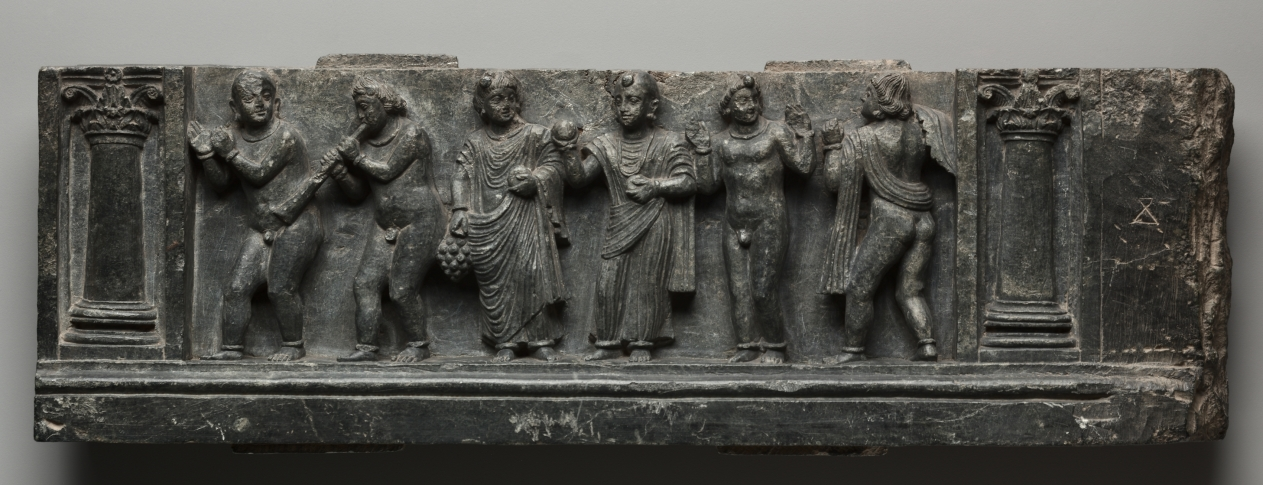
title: Procession of Non-Buddhists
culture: Pakistan, Gandhara, Buner area, early Kushan period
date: 1–100 CE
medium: schist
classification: Sculpture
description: The naked figures may be followers of a non-Buddhist religion, such as the Jain or Ajivika. The figures with unusual hairstyles may be depictions of actors from a theatrical troupe. The mood of the procession is joyous, led by a bejeweled nude man clapping his hands to the accompaniment of a wind instrument.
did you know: A mason's mark incised at the far right would indicate the position where this panel should be placed in the monument.